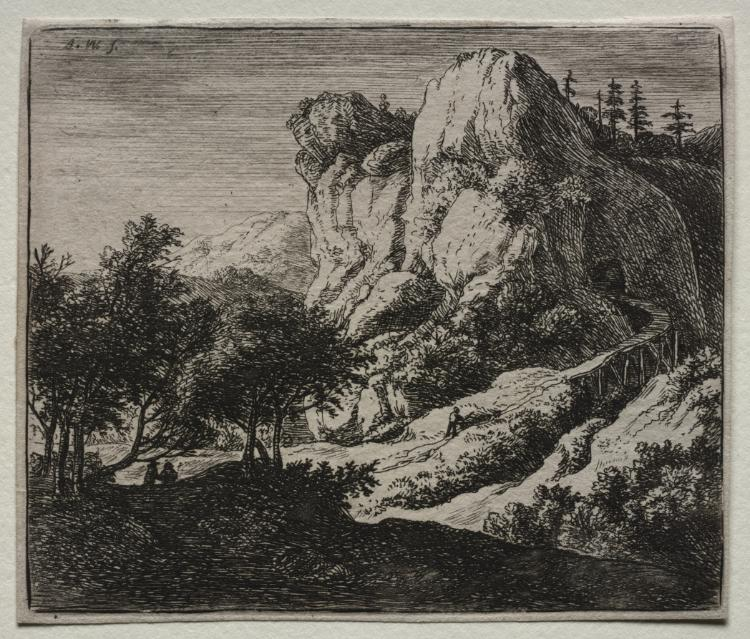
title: Four Landscapes: The Winding Wooden Bridge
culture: Netherlands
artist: Anthonie Waterloo (Dutch, 1609/10–1690)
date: 1637–90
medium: etching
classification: Print